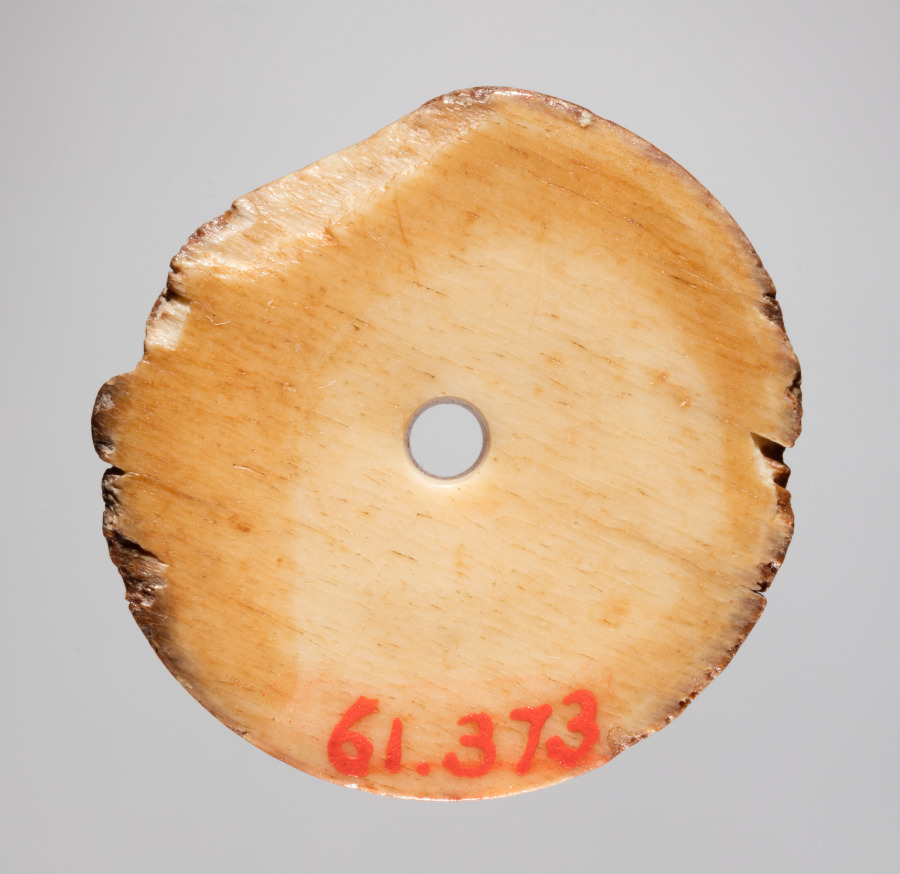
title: Spindle Whorl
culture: Iran, early Islamic period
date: 700s - 900s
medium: bone, incised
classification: Spindle Whorl